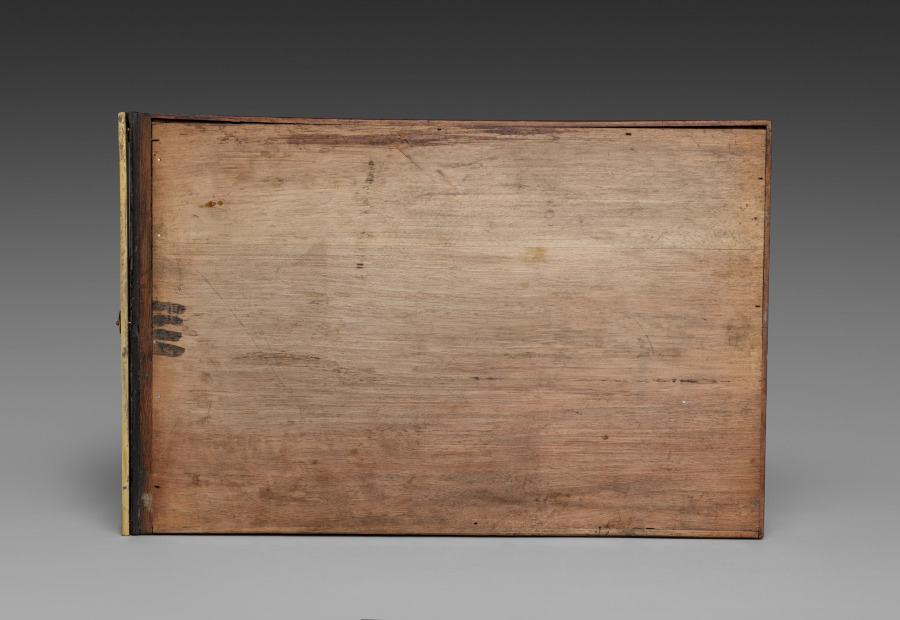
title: Side Drawer for Cabinet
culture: France, late 17th Century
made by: André-Charles Boulle (French, 1642–1732)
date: c. 1690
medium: ebony, marquetry in metal and tortoise shell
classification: Furniture and woodwork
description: Appointed cabinetmaker to King Louis XIV in 1672, André-Charles Boulle became a master of furniture making in France during the late 1600s until his death in 1732. Known primarily for his use of marquetry, in which metal patterns are inlaid into tortoiseshell then applied within the veneered surface of the furniture, Boulle established a level of quality and craftsmanship few others could achieve. As a result, his work found favor at the royal court and among other aristocrats and diplomats eager to impress the king. The inclusion of a medallion depicting Louis XIV within the bronze decoration of this chest would have identified the owner with the royal court. Often exhibiting stout architectural proportions with elegant groups of inlaid motifs such as the parrot on the central panel of this chest, Boulle’s designs are an example of the intellectual fashion for contrasting ideas, materials, and motifs.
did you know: Originally designed to sit atop an elaborate tall stand, this chest was likely altered in the late 1700s to reduce its scale and height.